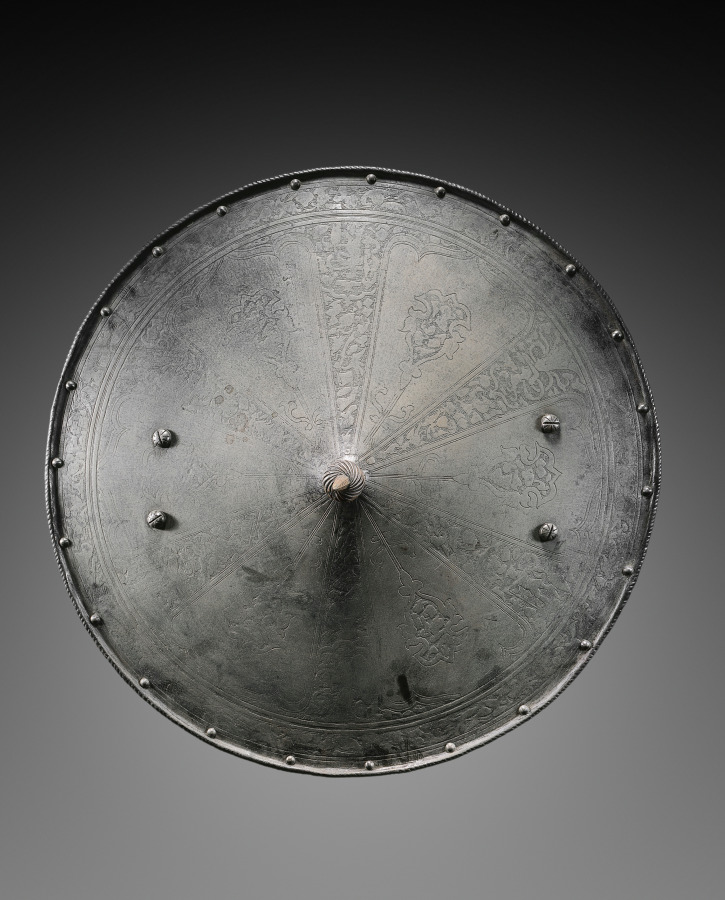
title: Round Shield (Rondache)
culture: North Italy, 16th century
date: c. 1550–1600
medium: steel, etched panels, roped border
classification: Arms and Armor